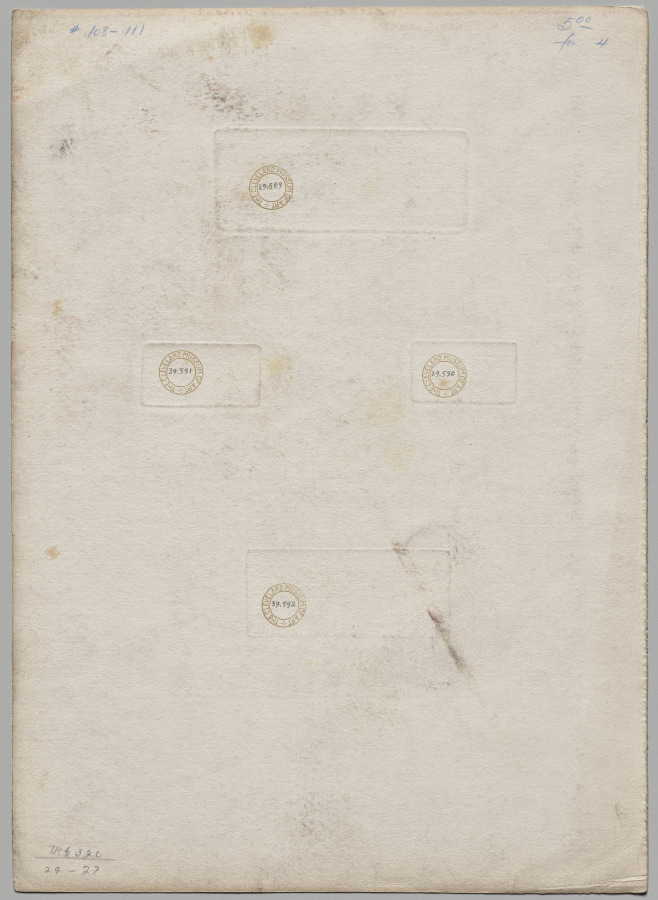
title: Etchings by Antoine de Marcenay de Ghuy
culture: France, 18th century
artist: Antoine de Marcenay de Ghuy (French, 1724–1811)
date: c. 1771–78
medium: etching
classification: Print